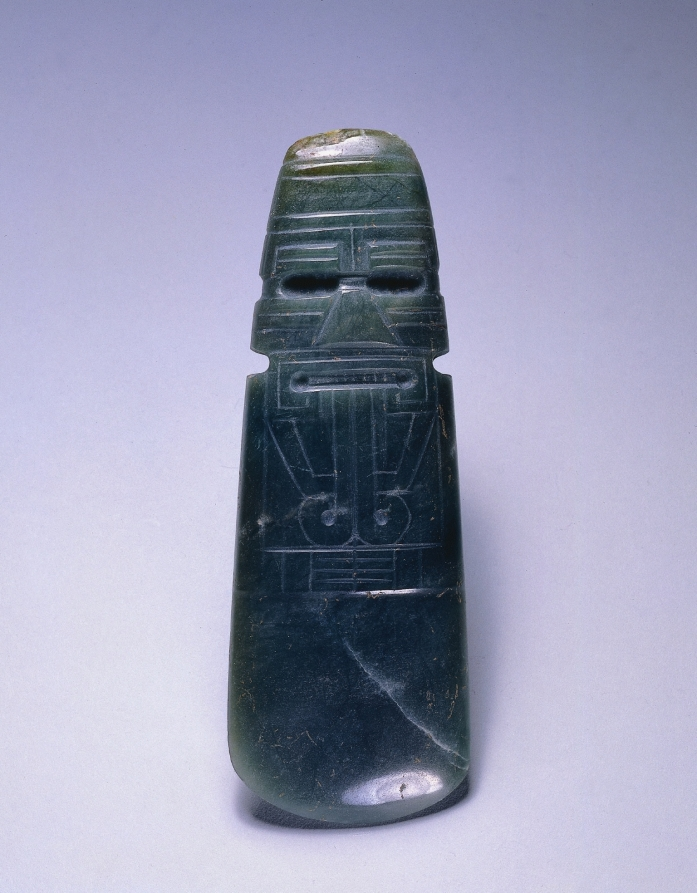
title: Celt-Shaped Pendant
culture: Costa Rica, Southern Nicoya region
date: c. 300 BCE–600 CE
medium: jadeite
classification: Jewelry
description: Costa Rican jade pendants may imitate the shape of axe blades (celts) used for agriculture. The pendants often take the form of "axe gods," creatures with human, bird, or animal traits. Jade carving was common in Costa Rica before ad 500, but then declined in importance. Gold eventually replaced jade as the region’s preferred luxury material.